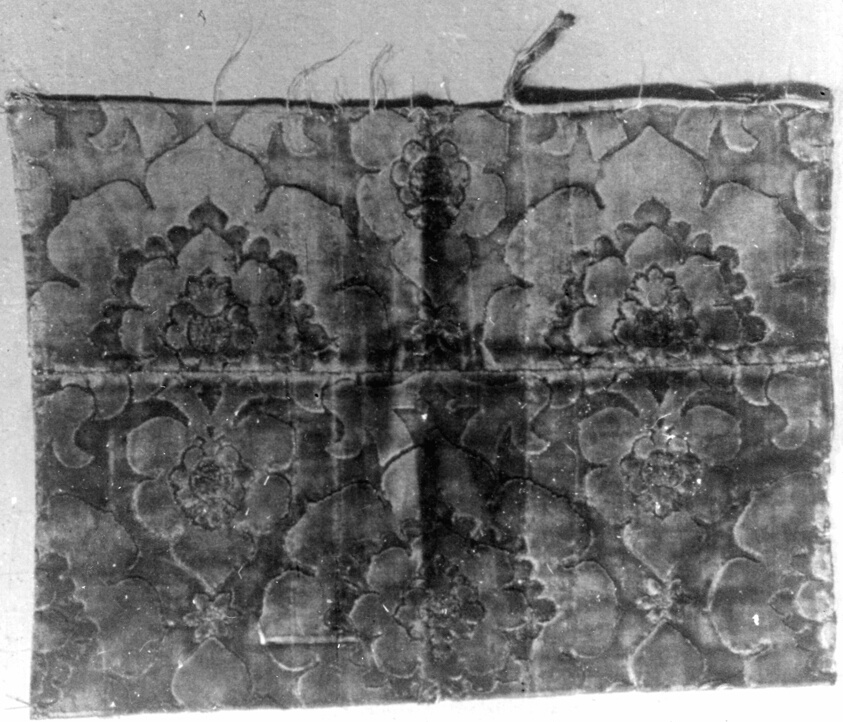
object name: Textile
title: Fragment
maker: Italy, Venice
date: 16th century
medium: Silk, warp-float faced 3:1 broken warp chevron twill weave with supplementarypile warps forming cut, pile-on-pile solid velvet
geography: Venice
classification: textile; weaving - velvet